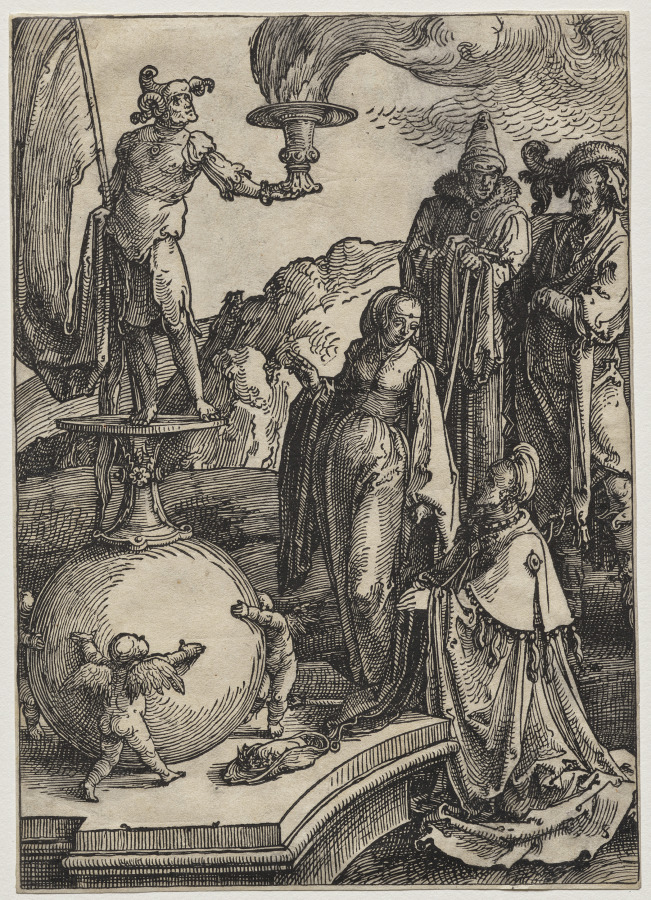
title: Solomon's Idolatry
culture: Netherlands, 16th century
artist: Lucas van Leyden (Netherlandish, 1494–about 1533)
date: 1516–1519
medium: woodcut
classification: Print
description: One can assume that the popularity of the earlier Power of Women series (on view nearby) inspired Lucas to produce another similar group. Also consisting of six subjects but somewhat smaller in size, this set reveals Lucas's increased ability to integrate figures more naturally into a setting. This scene, in which one of his wives persuades Solomon to worship idols, also demonstrates a desire to follow Albrecht Dürer's systematic style of hatching to produce tonal effects (see Dürer's The Large Passion: The Last Supper).